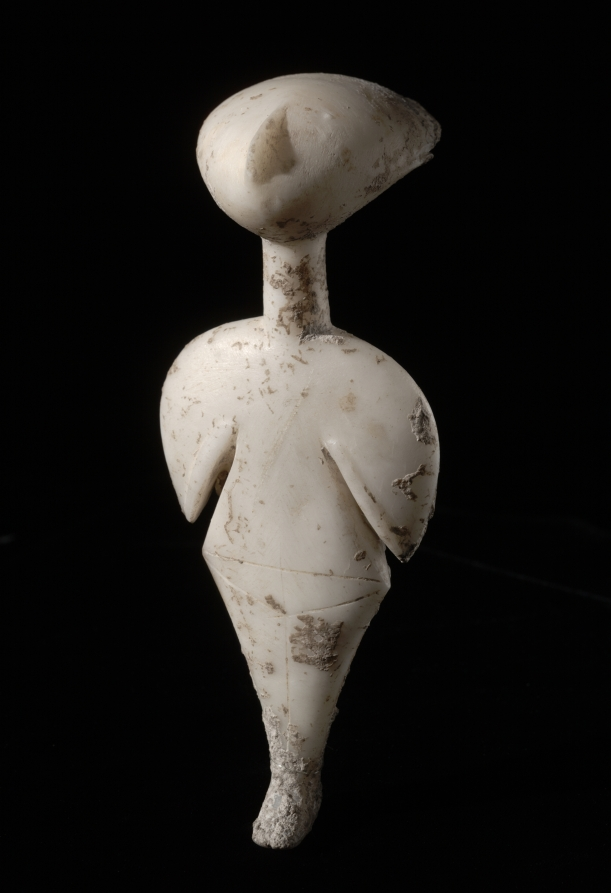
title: Statuette of a Woman: "The Stargazer"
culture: Western Anatolia, early Bronze Age (c. 3300–1200 BCE)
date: c. 3000 BCE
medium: marble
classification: Sculpture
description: "The Stargazer" moniker was given to this diminutive marble sculpture because its upturned head looks toward the heavens. Details carved into the stone are visible while painted features have been lost to time. We do not know how this object was used, but its enigmatic nature invites speculation.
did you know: We can identify this mysterious figure as female by the inscribed pubic triangle below her waist.